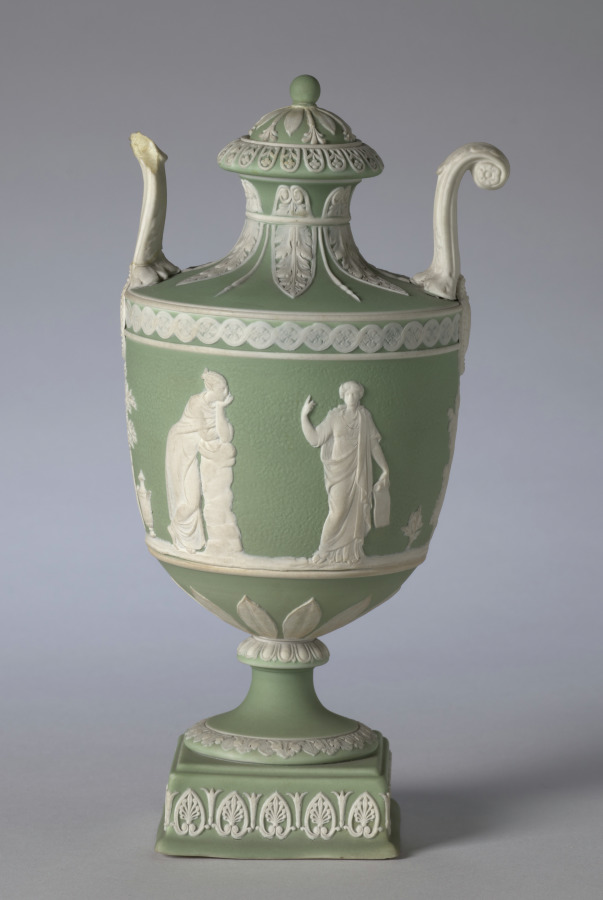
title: Covered Urn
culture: England, Staffordshire, late 18th-early 19th Century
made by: Wedgwood Factory (British)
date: c. 1800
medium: jasper ware with relief decoration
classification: Ceramic